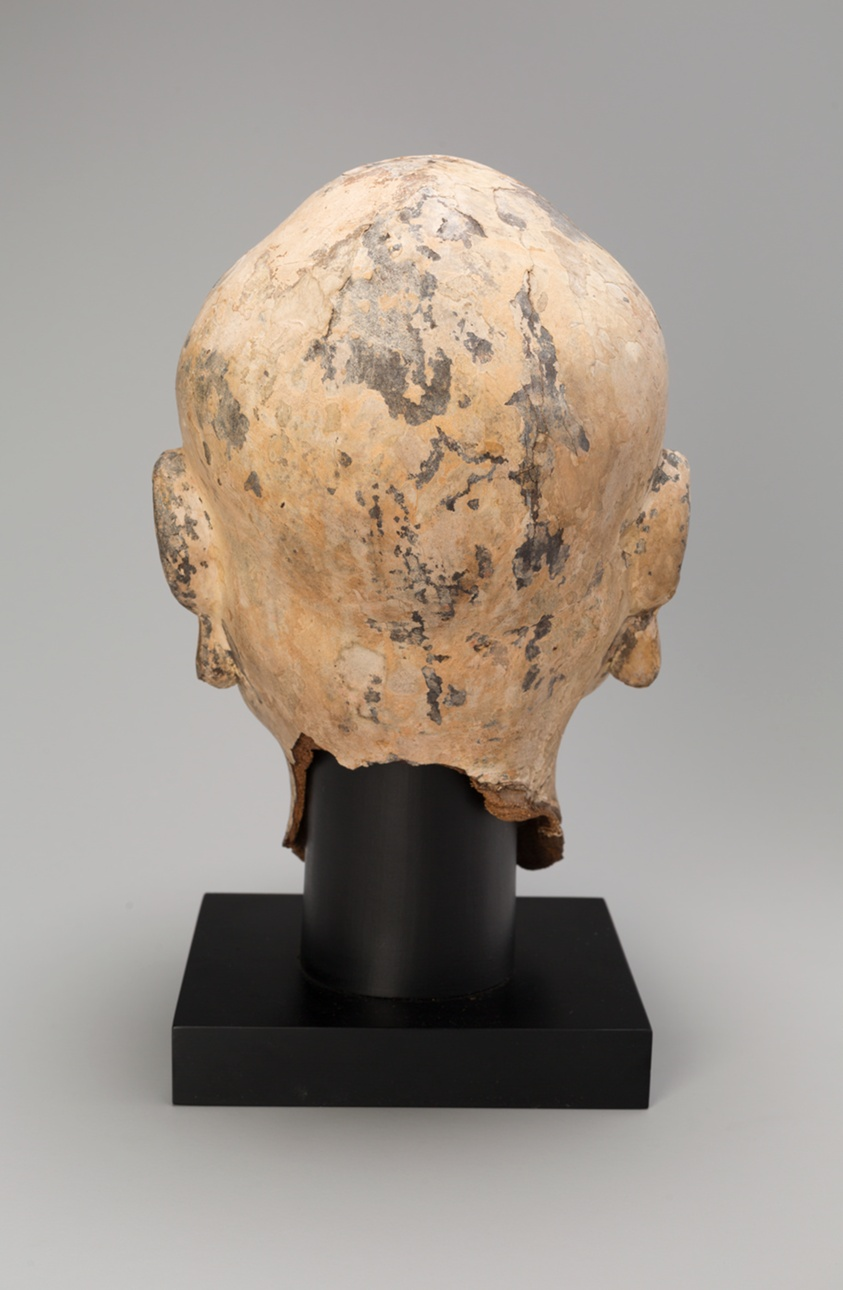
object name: Sculpture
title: Head of Luohan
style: Chinese (culture or style)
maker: China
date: Northern Song, Liao, or Jin dynasty, c. 11th century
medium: Hollow dry lacquer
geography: China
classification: lacquer; sculpture; asian art